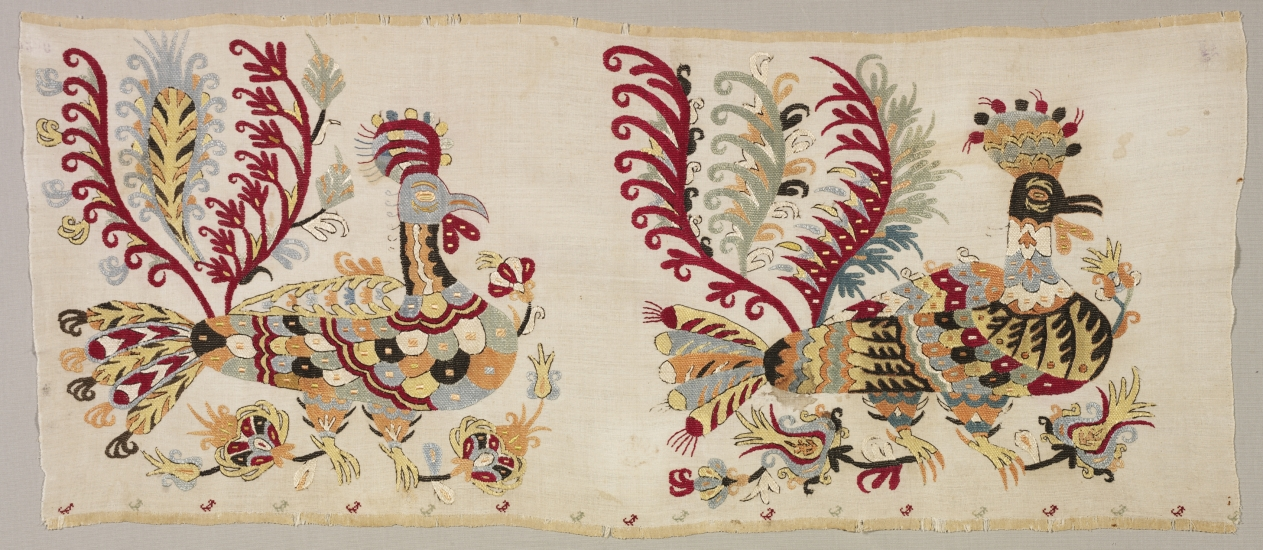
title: Panel, Probably from a Skirt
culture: Greece, Sporades Islands, Skyros, 19th century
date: 1800s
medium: embroidery: silk on linen tabby ground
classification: Embroidery